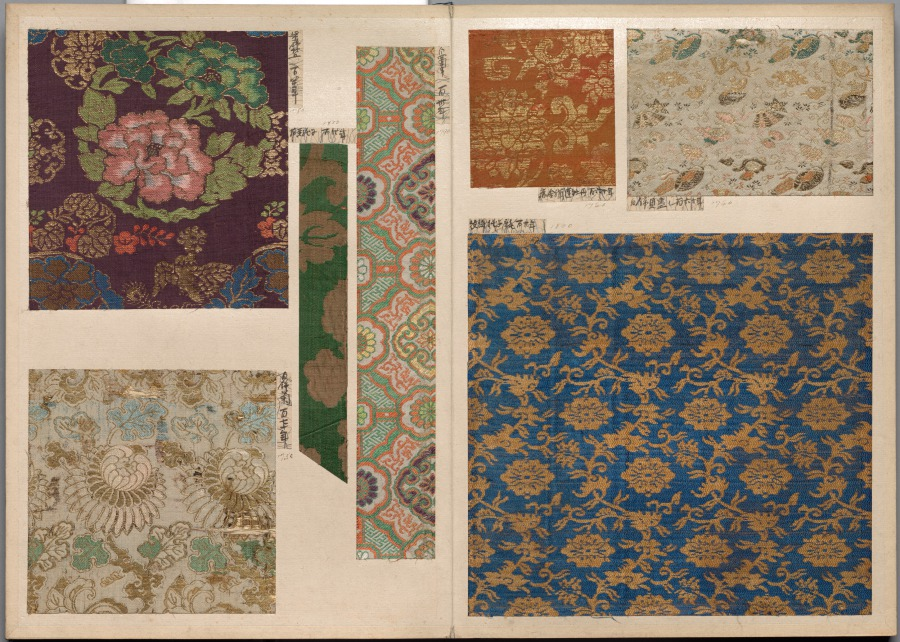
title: Album of Textile Samples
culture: Japan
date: 1790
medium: silk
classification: Textile